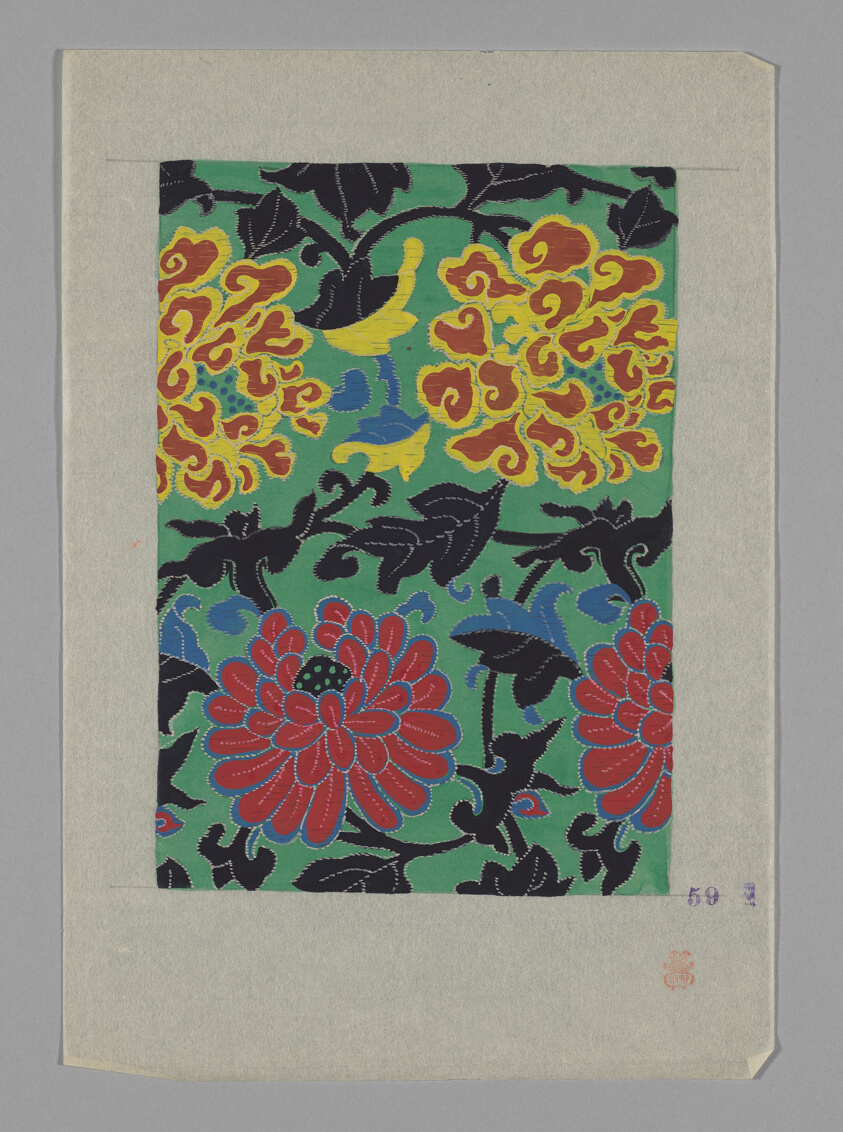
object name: Drawing and Watercolor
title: Design on Paper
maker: Japan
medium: Paper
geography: Japan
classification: textile; accessory - paper design; watercolor; paper